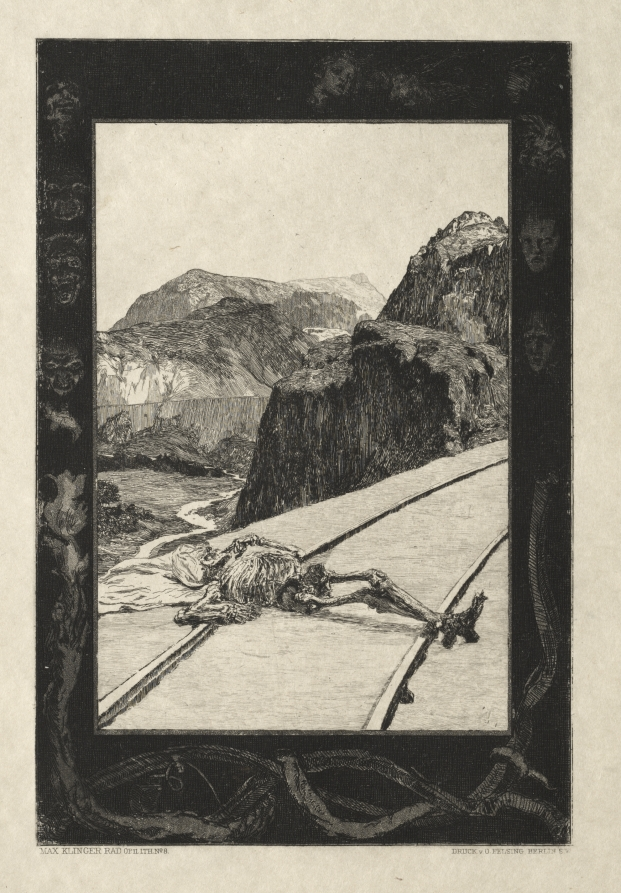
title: Vom Tode I, (Opus II, 1889) No. 8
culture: Germany, late 19th century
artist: Max Klinger (German, 1857–1920)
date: 1889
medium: etching and aquatint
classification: Print